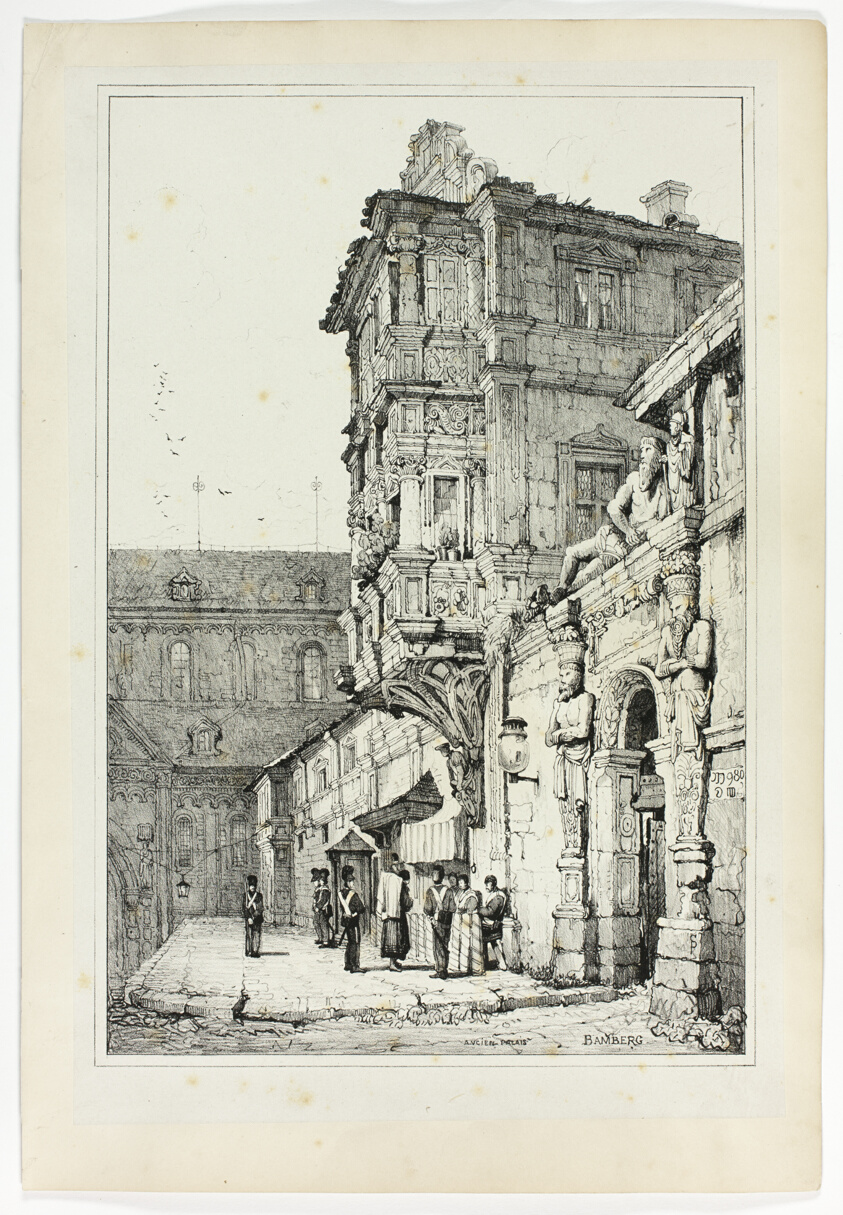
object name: Print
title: Ancien Palais, Bamberg, from Facsimiles of Sketches made in Flanders and Germany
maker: Samuel Prout (English, 1783-1852); printed by Charles Joseph Hullmandel (English, 1789-1850)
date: 1833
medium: Lithograph in black on grayish-ivory chine, laid down on ivory wove paper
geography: England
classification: lithograph; print; prints and drawing